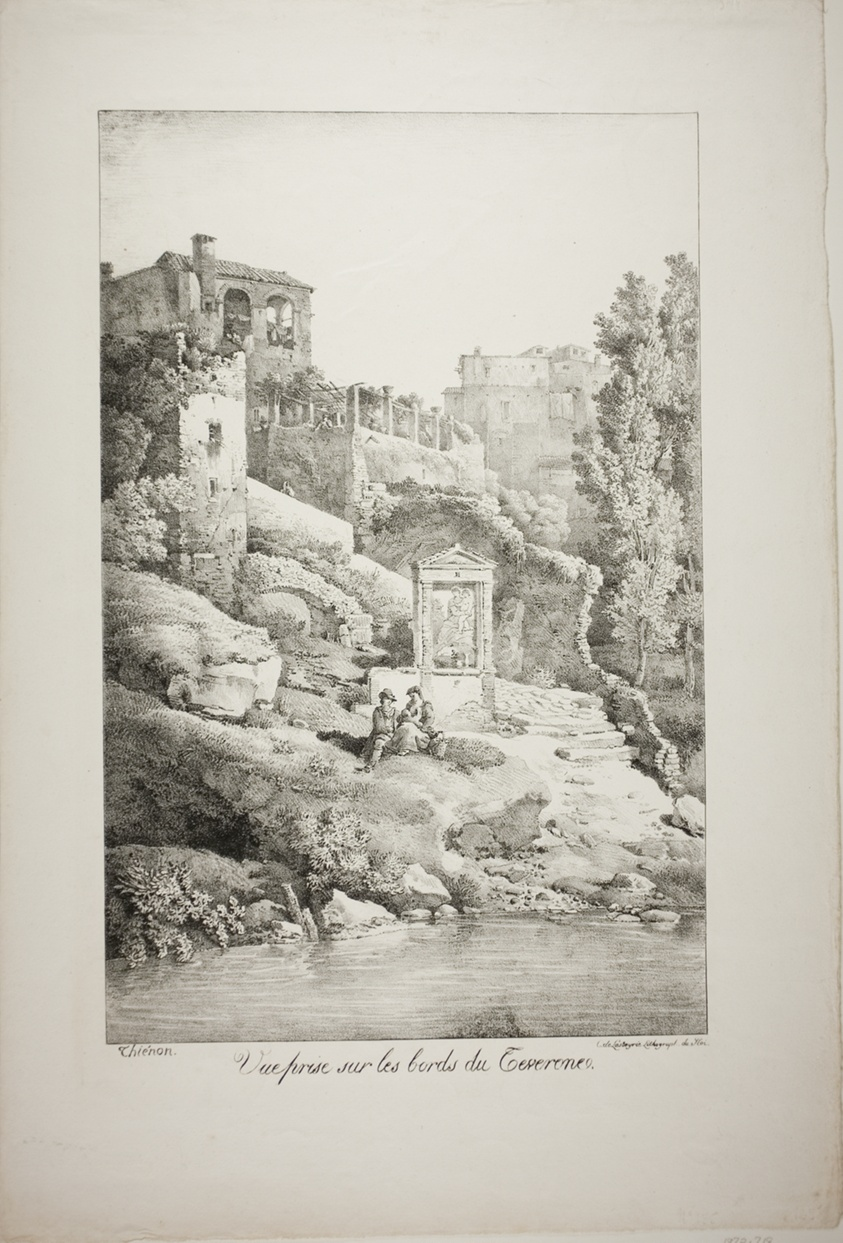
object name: Print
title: View From the Banks of the Teverone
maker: Claude Thienon (French, 1772-1846); printed by Comte de Charles Philibert Lasteyrie du Saillant (French, 1759-1849)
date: 1817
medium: Lithograph in black on ivory wove paper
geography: France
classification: lithograph; print; prints and drawing